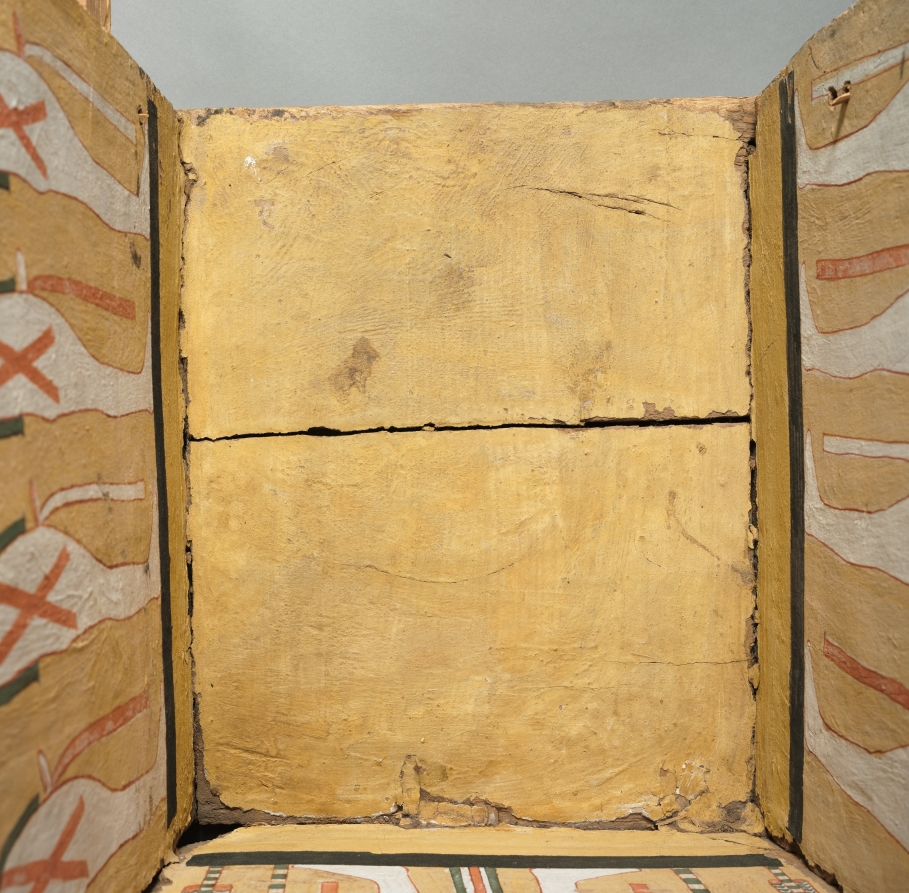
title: Coffin of Bakenmut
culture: Egypt, Thebes, Third Intermediate (1069–715 BCE), Dynasties 21–22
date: c. 1000–900 BCE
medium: gessoed and painted sycamore fig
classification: Funerary Equipment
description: The coffin of Bakenmut is one of the finest examples of painted wooden coffins made for the priests of Amen and their families at Thebes during Dynasty 21 and early Dynasty 22. The pharaohs of this time were no longer buried in the Valley of the Kings, but instead built tombs in the Delta, far to the north, where they resided. Security was lax in the Theban necropolis. The coffins and funerary goods of the wealthy citizens of Thebes were placed in unmarked and undecorated family tombs cut into the cliffs on the west bank of the Nile. All the care and detail that in more prosperous times were devoted to the decoration of the tomb chapel were now lavished on the elaborately painted coffins. Every available surface is crowded with religious scenes, images of funerary gods and goddesses, protective spells, and magical symbols. The deceased appears mummiform. An elaborate floral collar entirely covers the upper body, exposing only the separately attached hands (now lost). A pair of red "mummy braces" are crossed over the chest, their point of intersection marked by a winged sun disk. The lower body is covered with tiny figures modeled in gesso against a yellow background, which gives the effect of gold inlaid with glass or semiprecious stone. The decoration on the interior features two deified dead kings of Dynasty 18. Although these rulers had lived centuries before, memory of their greatness was still very much alive. The main scene near the top depicts Tuthmosis III, the great military pharaoh, who lived 500 years before Bakenmut. Posed as a mummy, the ruler wears a brilliant feathered garment enfolding him with falcon’s wings. The scene below features back-to-back seated images of Amenhotep I, regarded as the patron of the Theban cemetery and worshiped as a local god there.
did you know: Originally another smaller coffin was placed inside this outer coffin and in that the deceased with a mummy board would have rested.